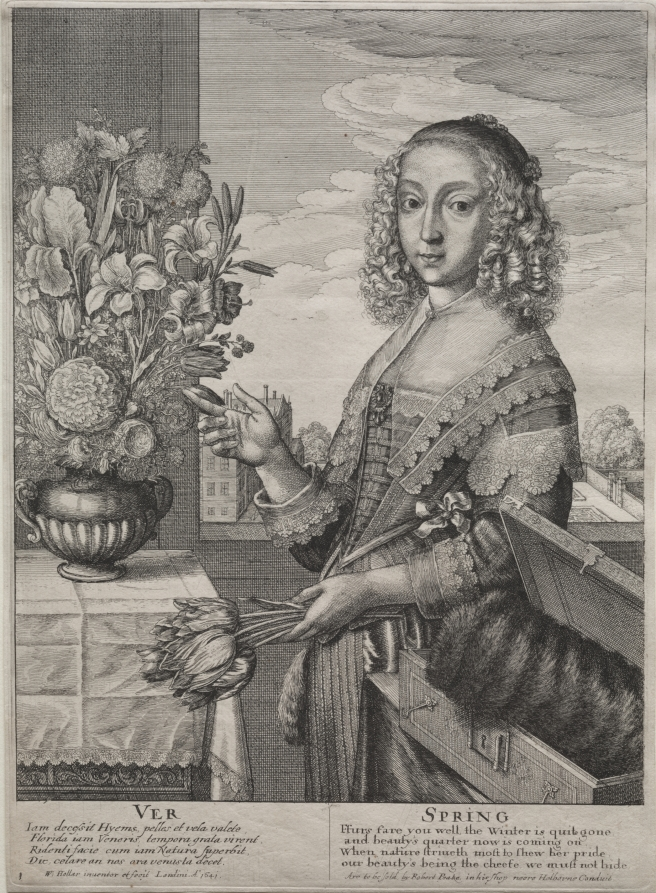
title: The Four Seasons: Spring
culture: Bohemia, 17th century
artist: Wenceslaus Hollar (Bohemian, 1607–1677)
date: 1641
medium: etching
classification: Print